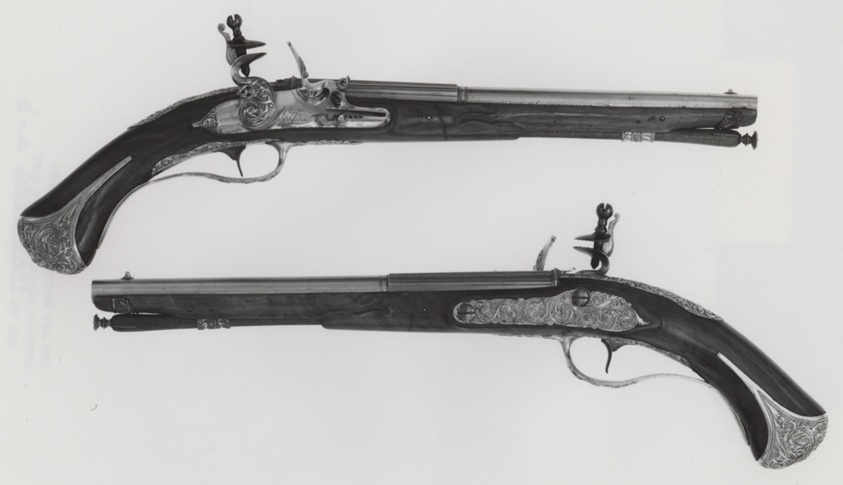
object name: Arms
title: Pair of Flintlock Pistols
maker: Barrel: Lazzarino Cominazzo; Lock: Giovanni Botti; Italian, Brescia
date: 18th century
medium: Wood and steel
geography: Brescia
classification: firearm-handgun; arms; arms and armor